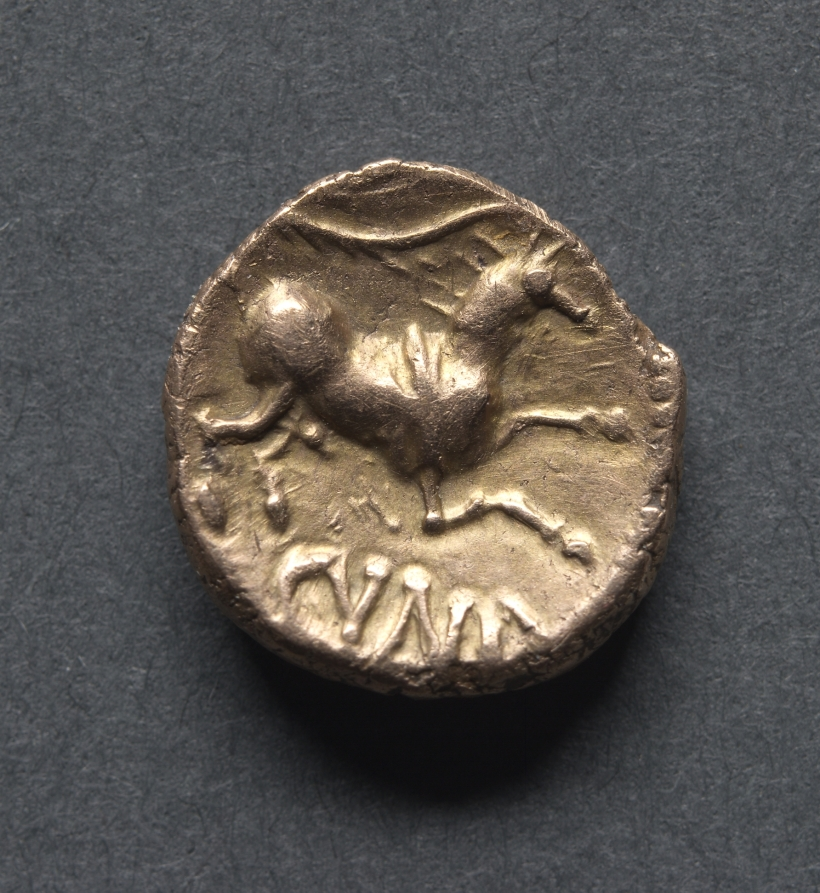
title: Cunobeline Quarter Stater: Horse and Branch (reverse)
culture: England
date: c. 10–40 CE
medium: gold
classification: Coins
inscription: "CVNO" below a galloping horse, to the right; above, a palm branch.